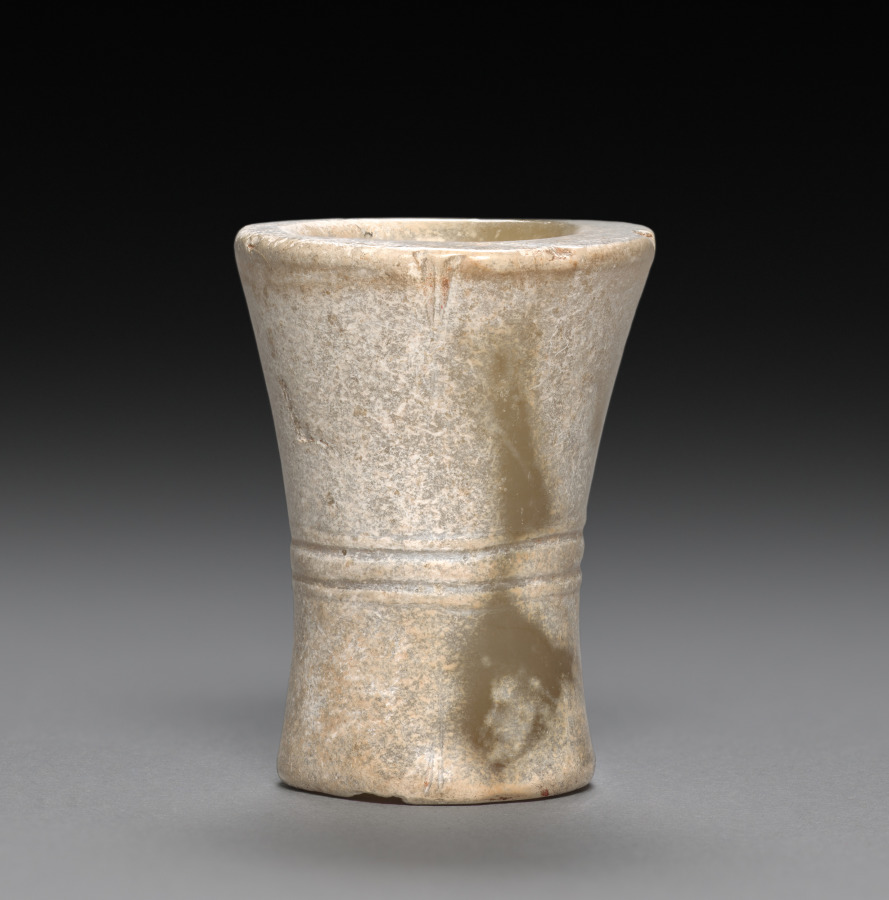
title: Bead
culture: China, Shang dynasty (c. 1600–c. 1046 BCE) to Zhou dynasty (c. 1046–256 BCE)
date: c. 1200–900 BCE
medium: jade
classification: Jade